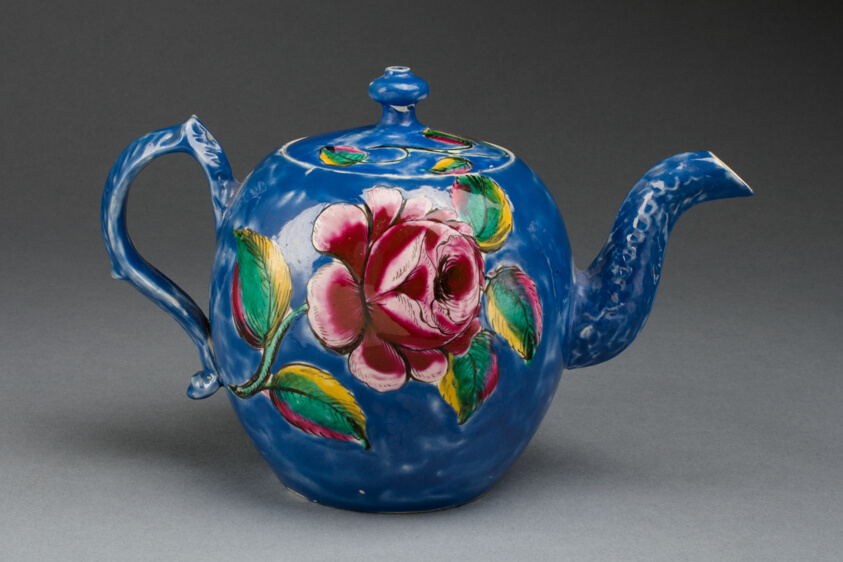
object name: Ceramics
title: Teapot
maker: Staffordshire, England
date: c. 1760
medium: Salt-glazed stoneware, polychrome enamels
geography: Staffordshire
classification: teapot; european decorative arts; ceramics; stoneware; salt-glazed stoneware